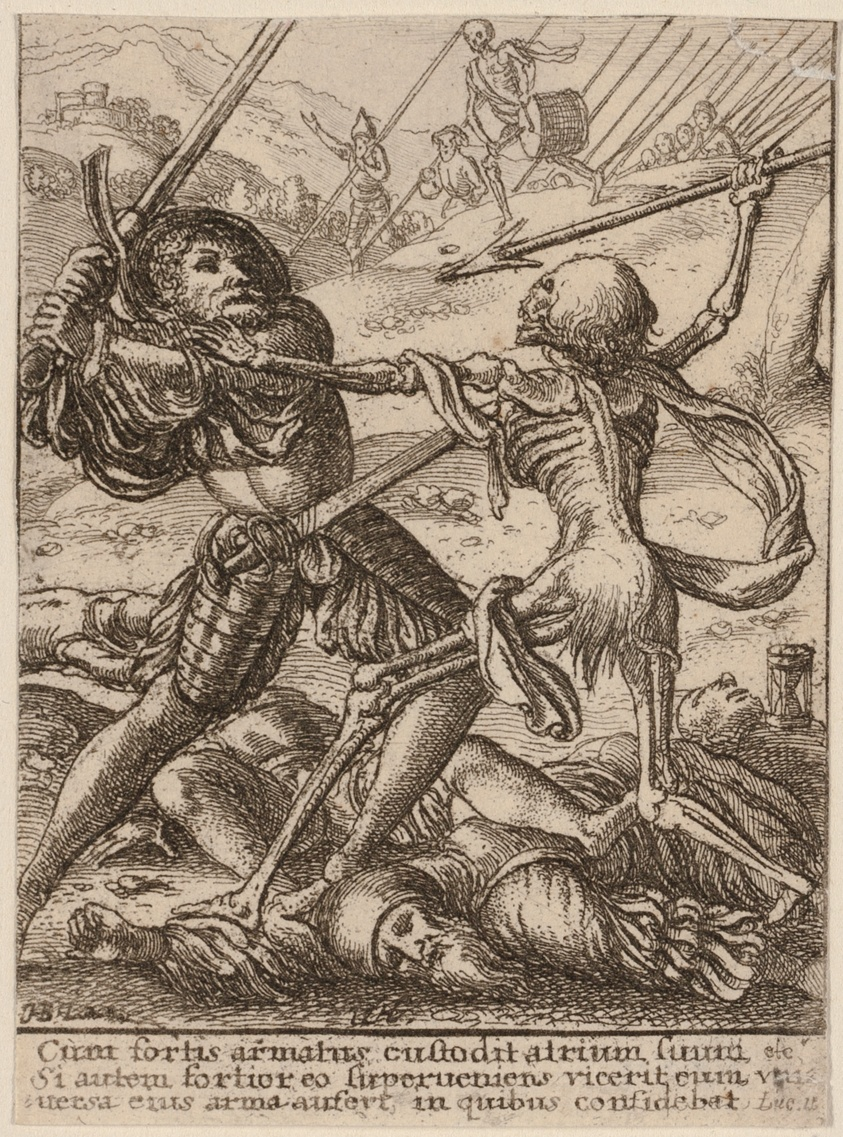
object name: Print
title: The Knight and Death, from The Dance of Death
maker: Wenceslaus Hollar (Bohemian, 1607-1677); after Hans Holbein the younger (German, c.1497-1543)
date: 1651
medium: Etching in black on ivory wove paper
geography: Bohemia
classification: etching; print; prints and drawing